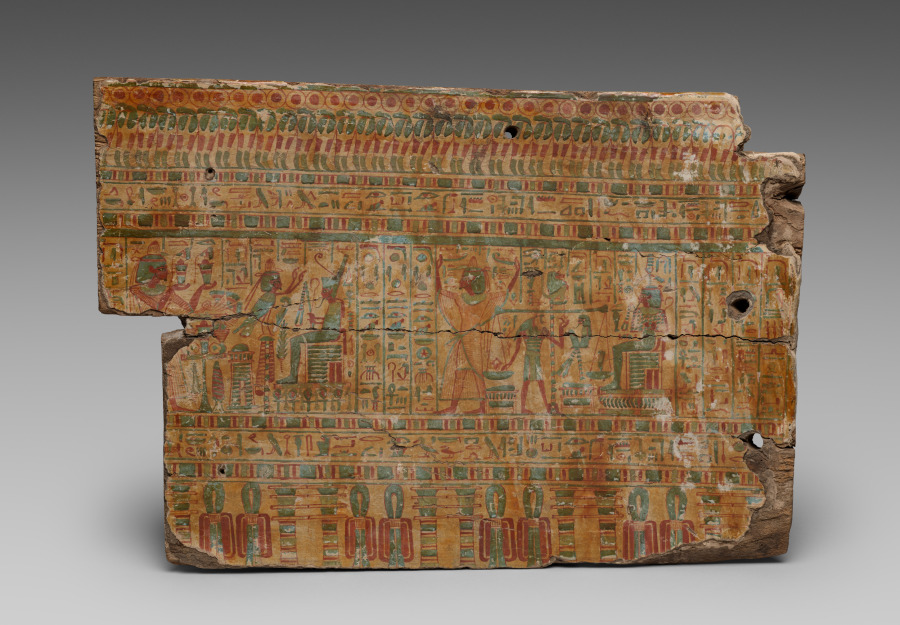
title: Side Panel from the Coffin of Amenemope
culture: Egypt, Thebes, Third Intermediate (1069–715 BCE), Dynasties 21–22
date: c. 976–889 BCE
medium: gessoed and painted sycamore fig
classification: Funerary Equipment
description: This panel illustrates one of the same scenes shown on the inside of Nesykhonsu’s coffin, allowing us to compare different artist’s styles. On the right stand the mummies of the priest Amenemope and his wife, Taditkhonsu. Their daughter, called "the lady of the house, Mutemperes," crouches before them with her hands wrapped around Amenenope’s legs in a traditional gesture of mourning. On the left, a priest, dressed in his finest linen garments and panther skin, holds in his upraised hands an incense burner and a curious curved implement typically associated with the "opening of the mouth" ritual, in which the mummy’s mouth was magically opened so that the deceased person could take in food and thus be brought back to life.